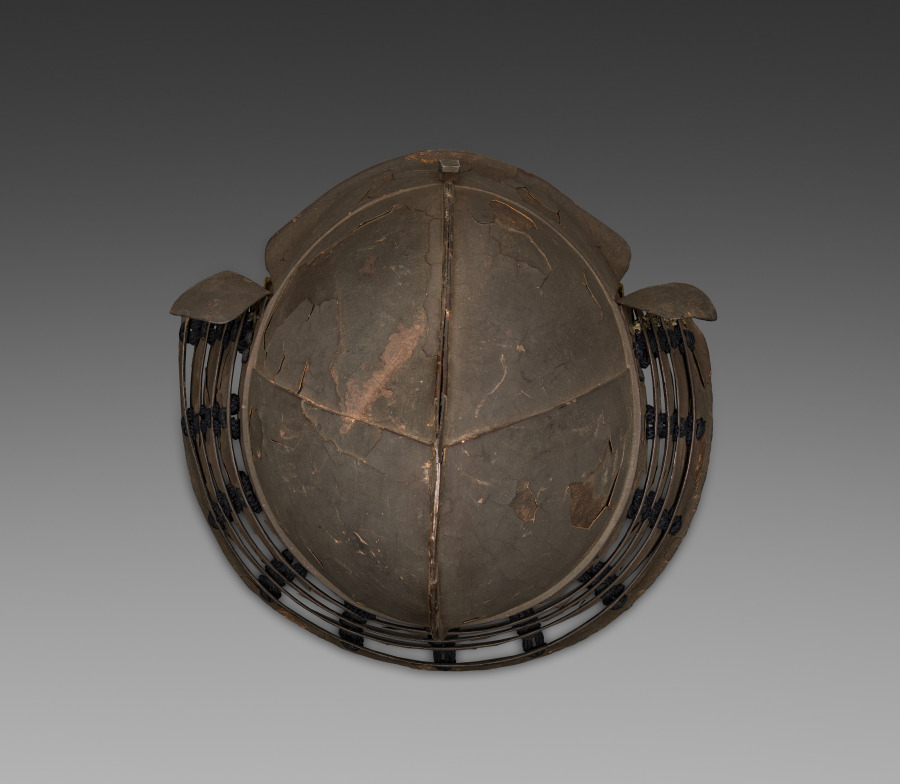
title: Helmet (Kabuto)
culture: Japan, Edo period (1615–1868)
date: 1615–1868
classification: Arms and Armor